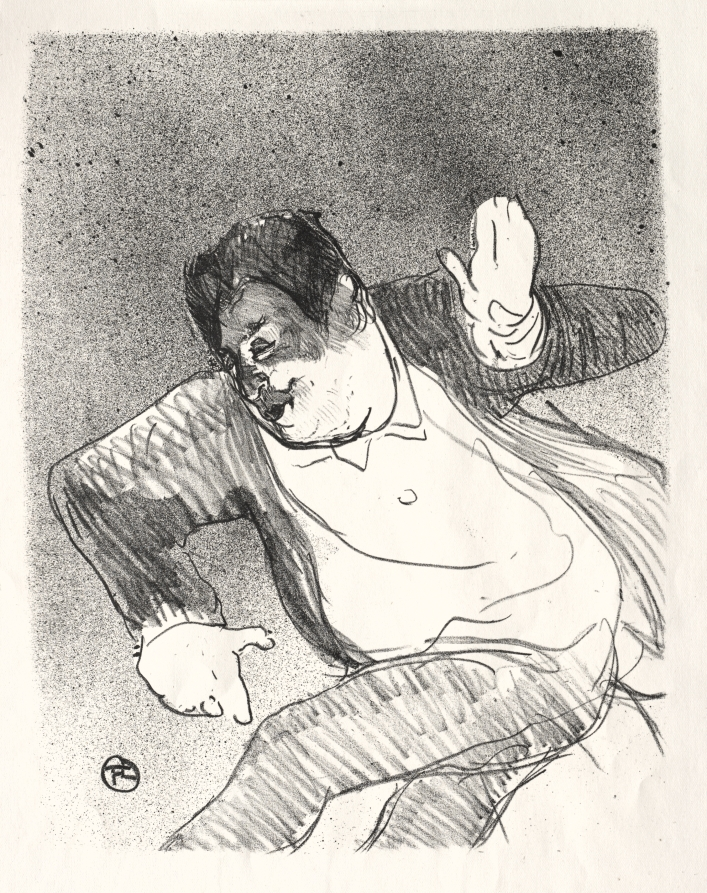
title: Caudieux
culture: France, 19th century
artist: Henri de Toulouse-Lautrec (French, 1864–1901)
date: 1893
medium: lithograph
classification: Print